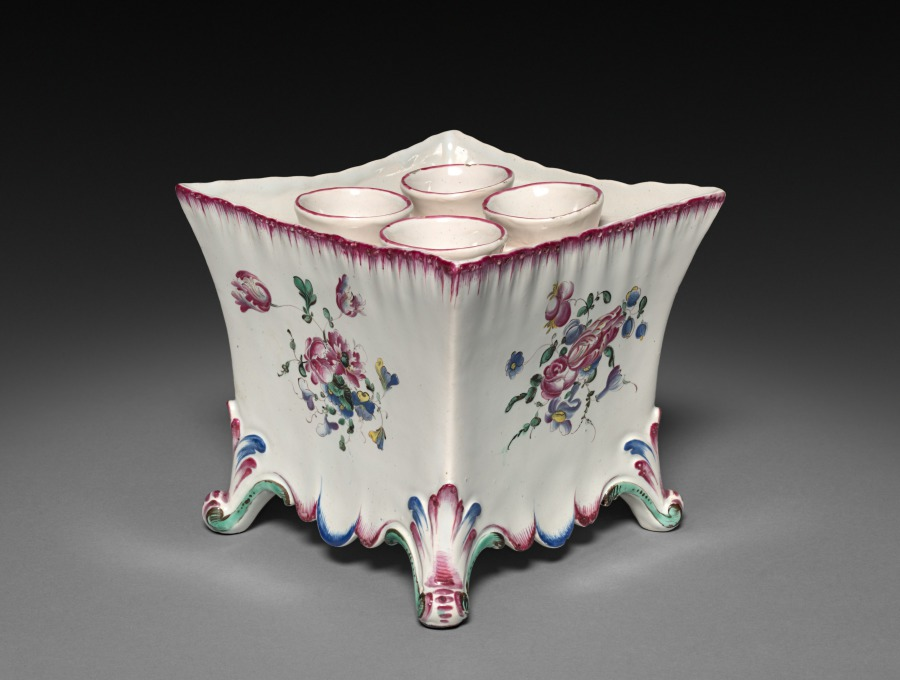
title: Flower Vase (Bouquetier)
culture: France, 18th century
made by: Aprey Pottery Factory (French)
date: c. 1775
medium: faience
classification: Ceramic